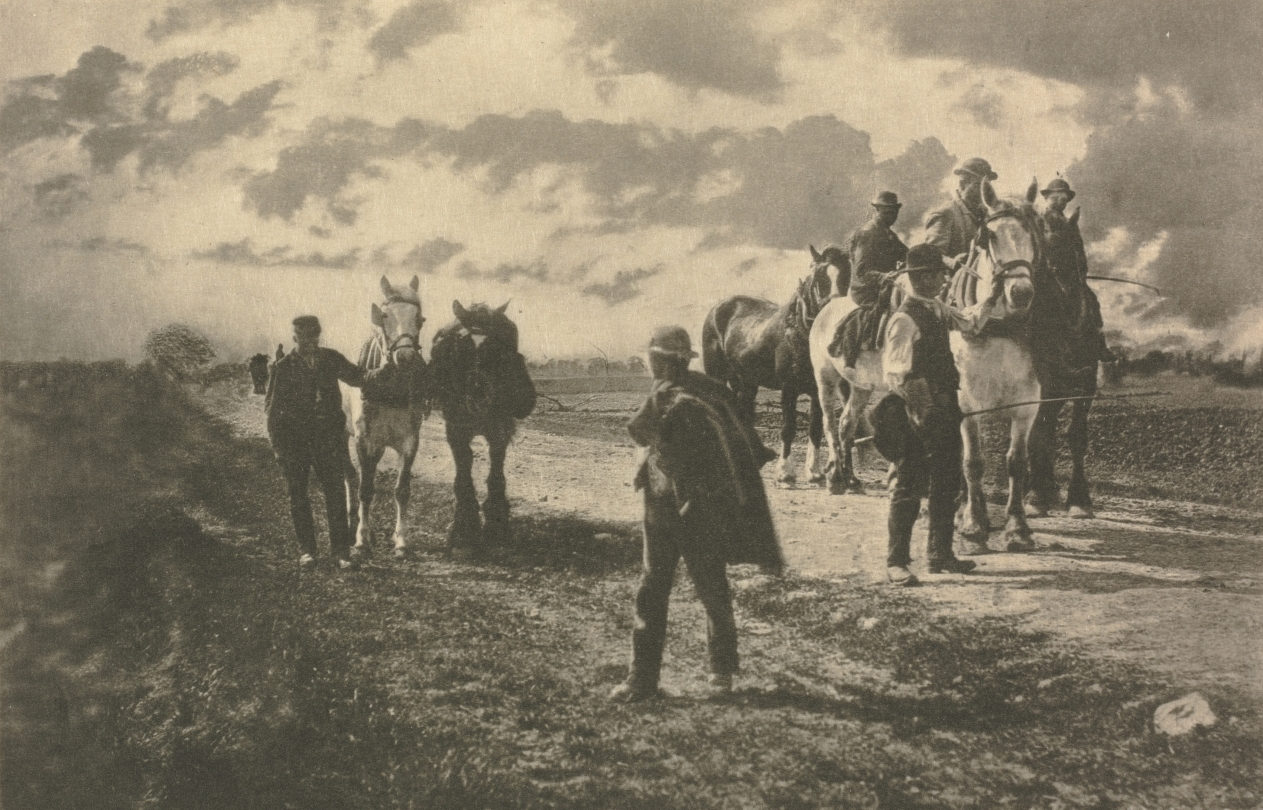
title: Camera Work: Berkshire Teams and Teamsters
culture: England, 20th century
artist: George Davison (British, 1856–1930)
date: 1907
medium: photogravure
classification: Bound Volume